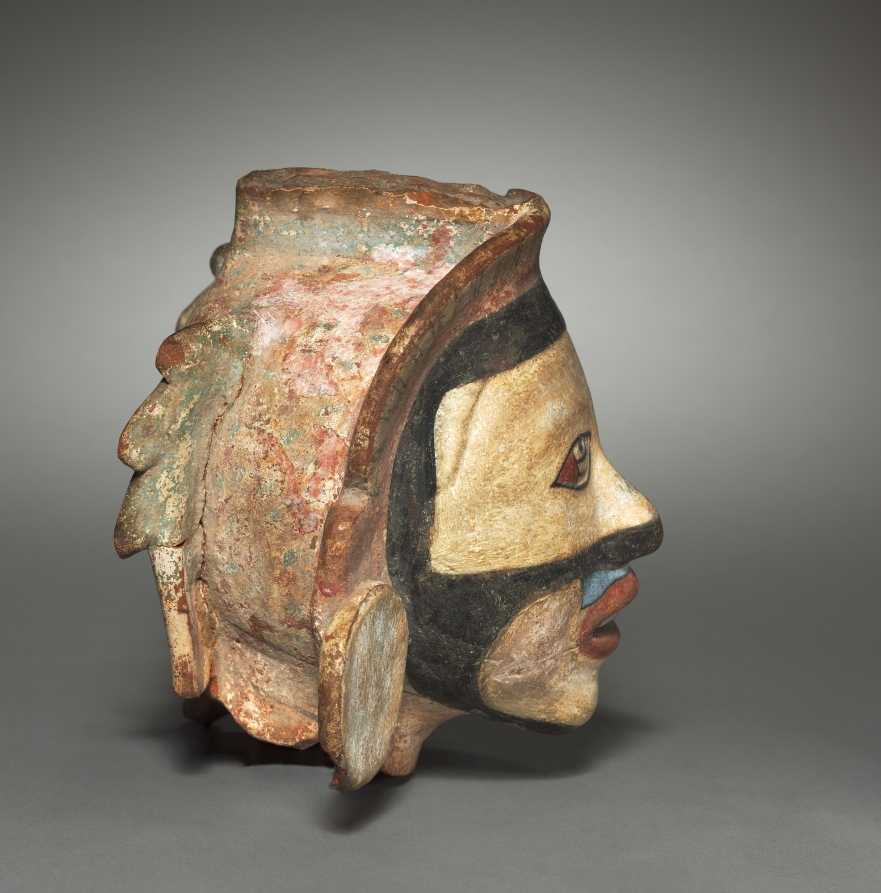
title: Head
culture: Mexico, Classic Veracruz (Totonac or Tajin)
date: 600–1100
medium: pottery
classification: Sculpture